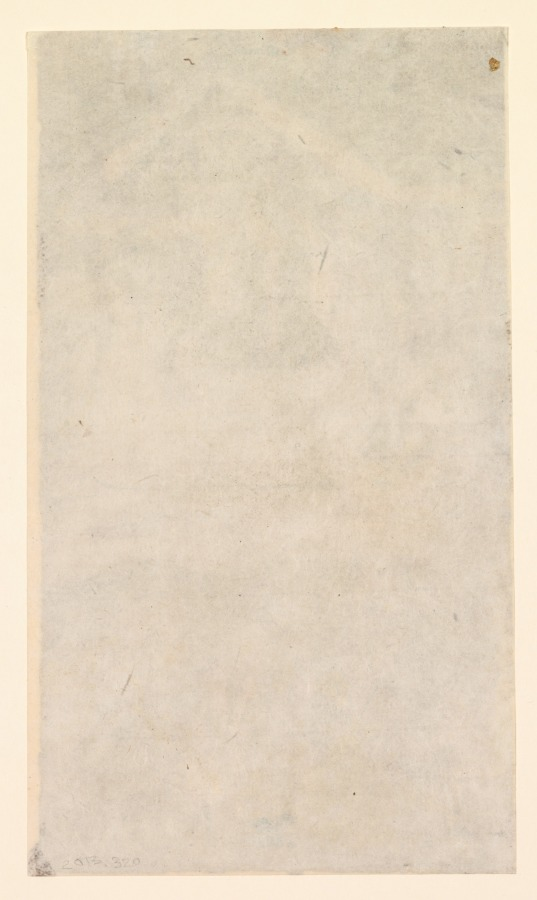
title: An Ambassador before Humayun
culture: Mughal India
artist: attributed to Miskin (Indian, active 1570s–c. 1604)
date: c. 1610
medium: Gum tempera and gold on paper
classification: Painting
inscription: Persian inscription at upper left probably added c. 1700s, in nasta‘liq script: the work of the master Miskin / Great King Hasan . . .]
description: Humayun, the second Mughal emperor of India, son of Babur and father of Akbar, is enthroned in an outdoor royal encampment. The scene recalls Humayun’s 15 years of exile between 1540 and 1555, many of which he spent traveling through Pakistan, Afghanistan, and Iran, after an Afghan rebel ousted him from India.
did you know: Humayun wore a special type of turban, his Taj-i Izzat (Crown of Power and Glory).